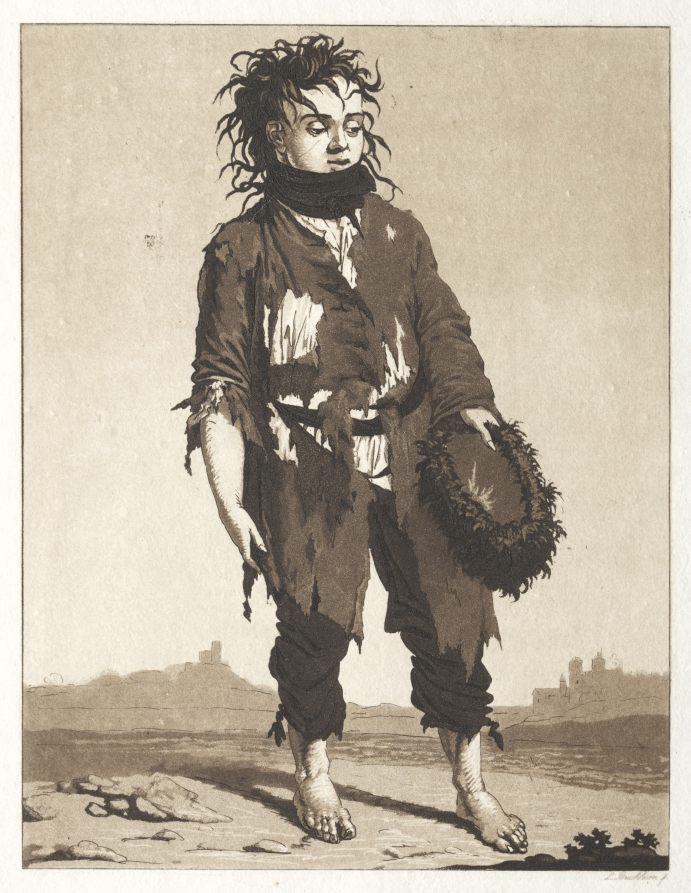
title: The Young Beggars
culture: Germany, late 18th-early 19th century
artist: Karl Ludwig Bernhard Buchhorn (German, 1770–1856)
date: c. 1800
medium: aquatint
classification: Print